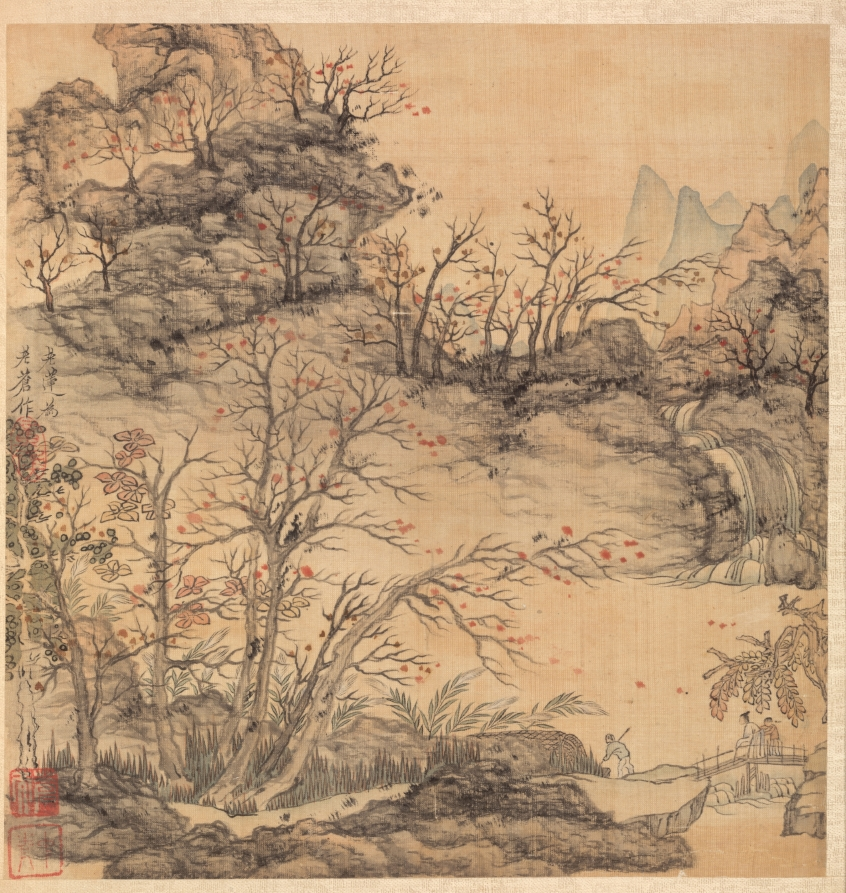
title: Paintings after Ancient Masters: Autumn Landscape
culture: China, Ming dynasty (1368–1644)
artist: Chen Hongshou (Chinese, 1598/99–1652)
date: 1598–1652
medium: album leaf; ink and color on silk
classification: Painting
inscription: Lao-lien painted for Lao-ts'ang. [Seal] Chang-hou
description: The twenty paintings in this double album by Chen Hongshou include landscapes, figures, and flowers. It also has one leaf featuring a woman, an often-used subject not found in the other albums from the latter part of his career. His late works are wonderful summations of Chen's peculiar and quirky art—archaistic, hyper-refined—but without accompanying shallowness or sentimentality. His figures and landscapes in the late albums are miniaturized, not unlike the small Chinese gardens, or the carefully selected small table rocks or old roots used for contemplation to see the world in miniature. This loss of scale is quite deliberate and reflects the psychological situation of a depressed class like the Ming loyalist officials and scholars, deprived of their integrity and honor, and forced to lead a diminished and restricted existence.